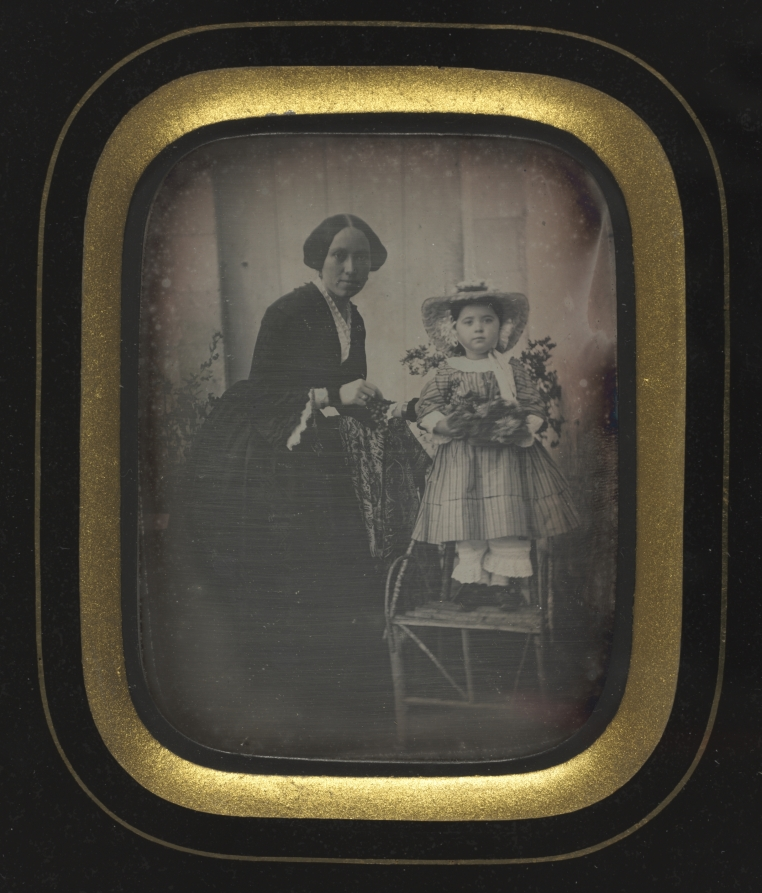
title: Child Standing on a Chair Holding Flowers, with Mother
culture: France, 19th century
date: c. 1855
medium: daguerreotype, quarter-plate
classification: Photograph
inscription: written in pencil on recto of frame:"80581/3"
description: Until the mid-1850s the daguerreotype process was the method preferred by the commercial photographers willing to meet the ever-growing demand for likenesses of family and friends. This daguerreotype captures the patience of a mother and child, who were required to hold their poses for some time during the exposure of the silver-coated copper plate. Only the bouquet of flowers held by the child is slightly blurred. Characteristic of the technique, the details in the image—fabric, facial features, and accessories—are clearly defined.